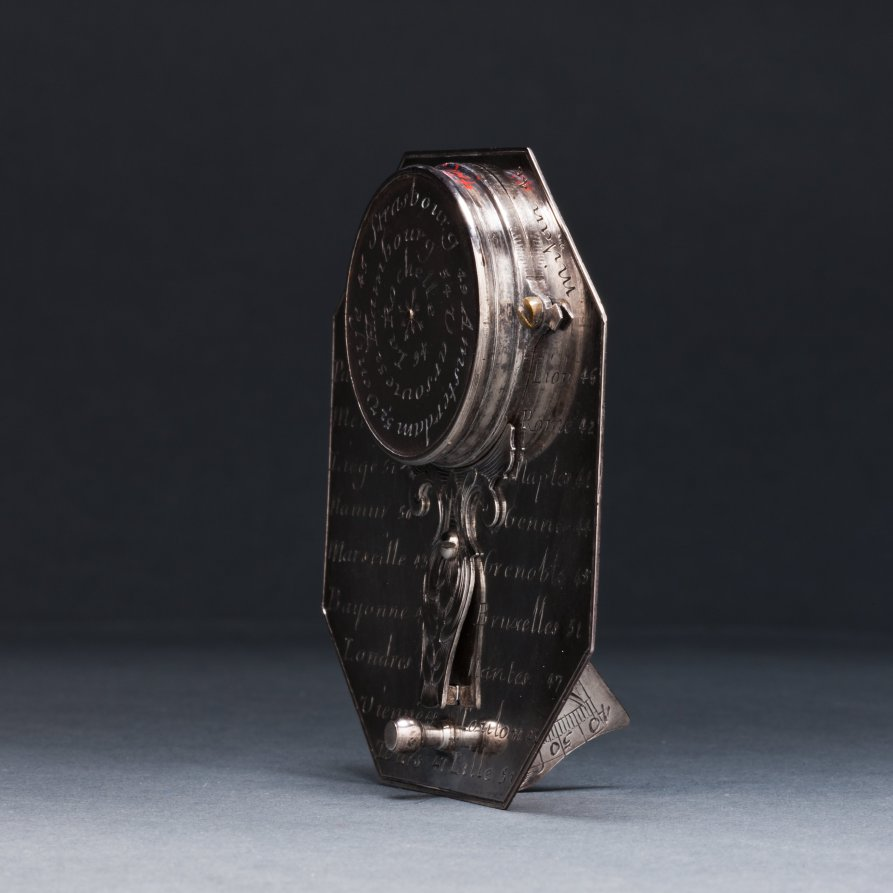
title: Butterfield Sundial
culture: France, 18th century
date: 1700s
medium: silver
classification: Silver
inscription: [Engraved signature above the compass in ribbon band]: "N. BION A Paris"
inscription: [Engraved on the face of the sundial]: “Pour 55° 4-5-6-7-8-9-10-11 50° IIII-V-VI-VII-VIII-IX-X-XI 45° 5-6-7-8-9-10-11 40° -VI-VII-VIII-IX-X-XI'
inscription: [Engraved on the other side]: "Pour 55° -8-7-6-5-4-3-2-1-0 50°-VIII-VII-VI-V-IIII-III-II-I 45°-8-7-6-5-4-3-2-1 40°-VII-VI-V-IIII-III-II-I"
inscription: [Engraved around the compass]: “NORD-OUEST-SUD-EST”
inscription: [Engraved on the back of the sundial]: “Turin 44 Milan 46 Paris 49 Lion 46 Metz 49 Rome 42 Liege 51 Naples 44 Namur 50 Gennes 44 Marseille 43 Grenoble 45 Bayonne 43 Bruxelle 51 Londres 52 Nantes 47 Vienne 48 Toulon 43 Tours 47 Lille 51”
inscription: [Engraved around the back of the compass]: “Venise 45 Strasbourg 49 Amsterdam 52 Hambourg 54 Varsovie 52 La Rochelle 46”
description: Butterfield-type sundials are characterized by their adjustable gnomons, metal flaps that cast a shadow on the dial’s face to indicate the hour, and geographical indices. This sundial has a scale adjustable between latitudes of 40° to 60° north. The latitudes of 26 European towns are engraved on its back for quick reference. With an intricately engraved silver face, it would have functioned as a fashionable traveler’s accessory.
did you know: Butterfield-style sundials were named after Micheal Butterfield, an English scientific and mathematical instrument maker who worked in Paris between 1674 and 1724.